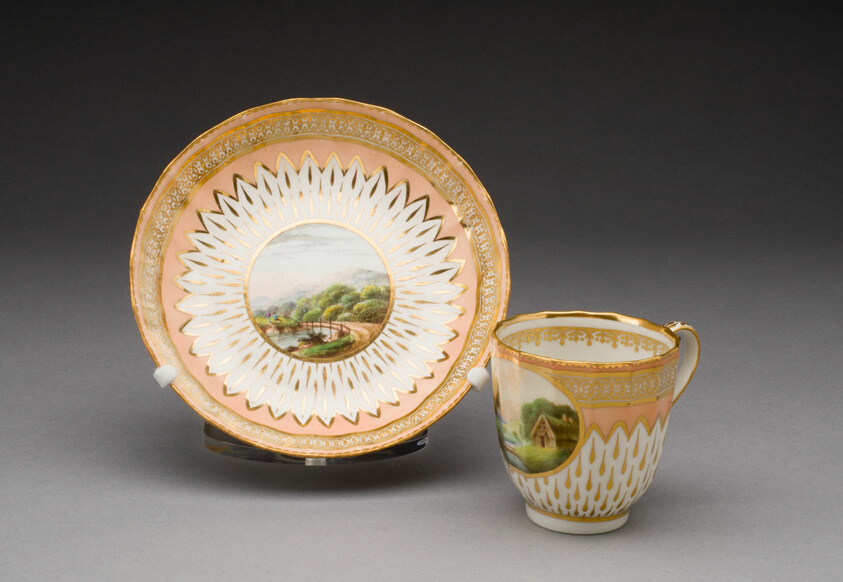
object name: Ceramics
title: Cup and Saucer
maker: Derby Porcelain Manufactory (England, 1750-1848)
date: 1780/95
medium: Soft-paste porcelain, polychrome enamels and gilding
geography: Derby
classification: drinking vessel; porcelain; european decorative arts; ceramics